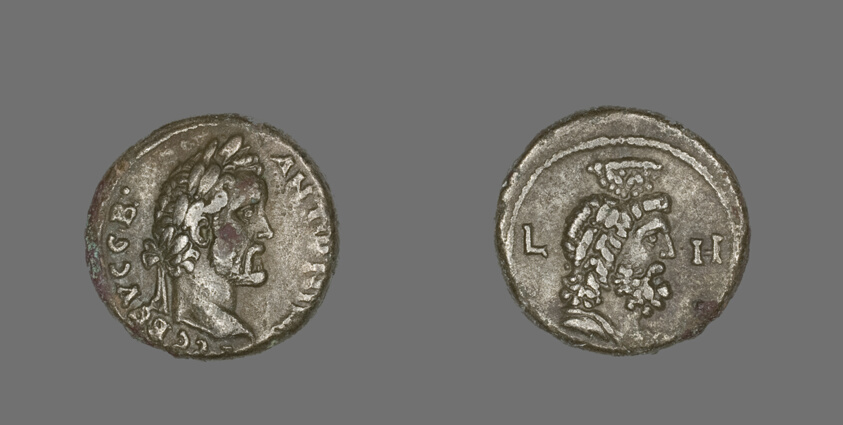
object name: Coin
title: Coin Portraying Emperor Antoninus Pius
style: roman period (egyptian), greco-roman (egyptian)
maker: Roman, minted in Alexandria, Egypt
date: 145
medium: Billon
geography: Egypt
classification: coin; ancient art